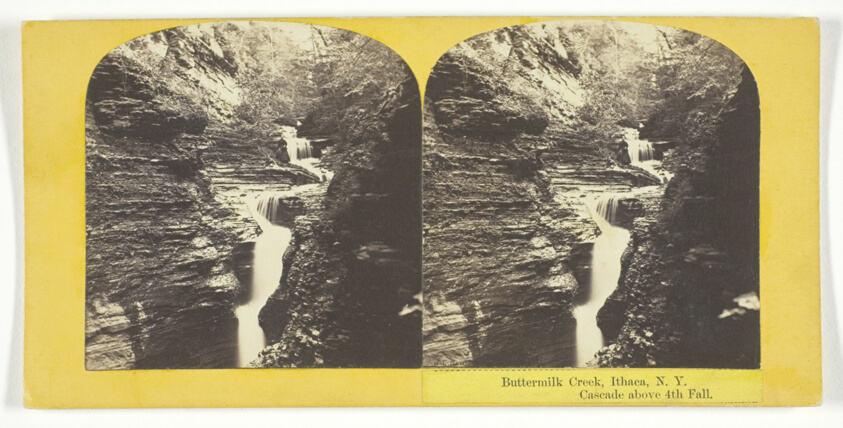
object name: Photograph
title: Buttermilk Creek, Ithaca, N.Y. Cascade above 4th Fall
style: 19th century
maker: J. C. Burritt; American, active 1860s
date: 1860/65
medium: Albumen print, stereo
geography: Ithaca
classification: photography; photograph; albumen silver print; stereograph (albumen)